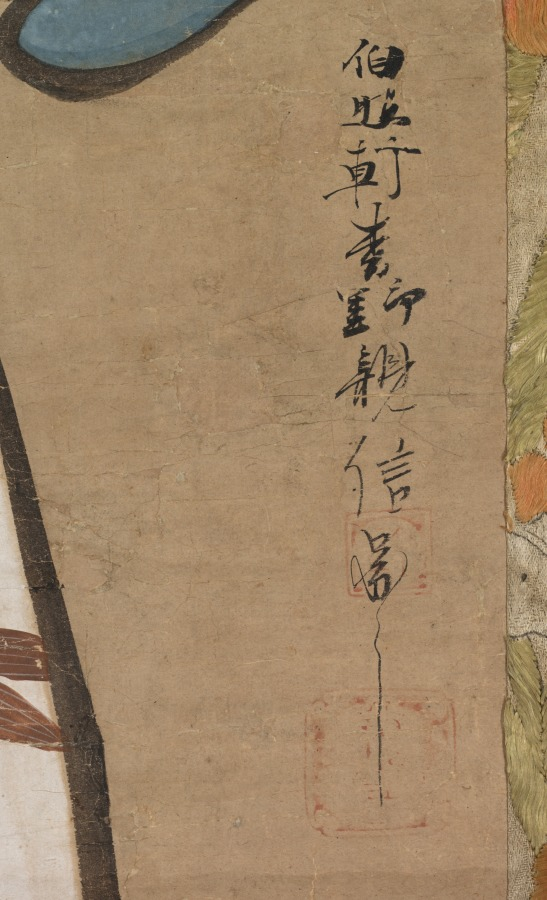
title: Courtesan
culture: Japan, Edo period (1615–1868)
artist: Matsuno Chikanobu (Japanese, active 1716–35)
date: 1716–35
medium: hanging scroll; ink and color on paper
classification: Painting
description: A glamorous courtesan sports an outer robe decorated with large roundels featuring plant motifs including iris and bush clover. Little is known about the life and artistic training of the painter Matsuno Chikanobu, an ukiyo-e artist who painted in a style strongly reminiscent of that of the Kaigetsudō studio. Many of his known paintings are on silk, and executed with high quality pigments, indicating that his primary clientele were wealthy individuals.